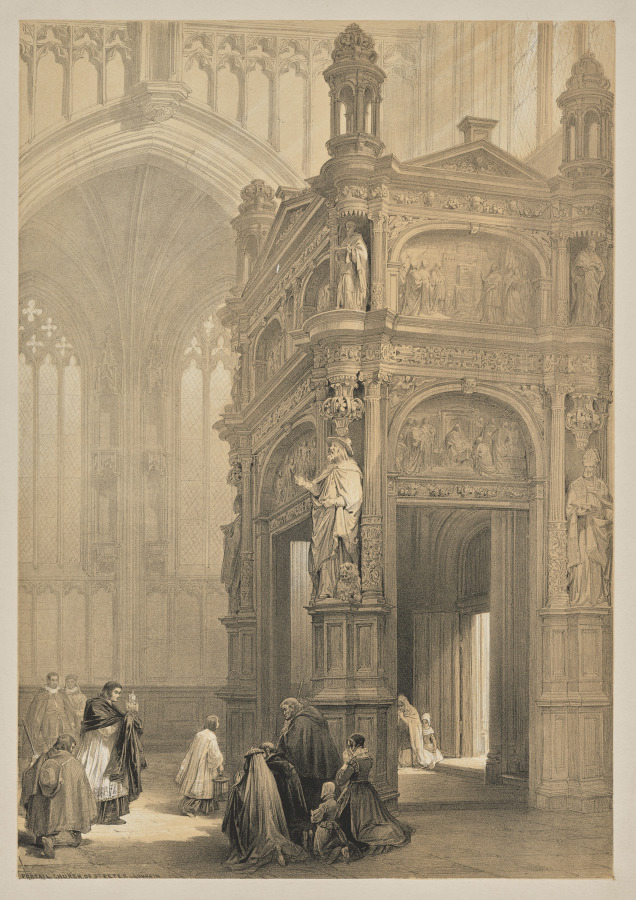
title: Sketches in Belgium and Germany, Second Series: No. 20 - Portail, Church of St. Peter, Louvain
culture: England, 19th century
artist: Louis Haghe (British, 1806–1885)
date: 1845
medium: lithograph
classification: Print